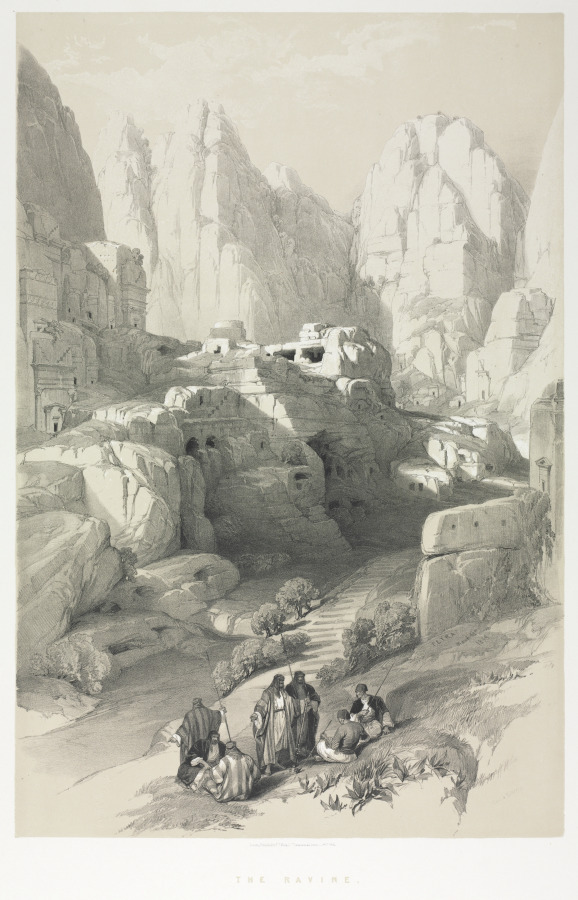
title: The Holy Land, Syria, Idumea, Arabia, Egypt & Nubia: Petra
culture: England, 19th century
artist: Louis Haghe (British, 1806–1885)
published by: F. G. Moon (British, 1797–1871)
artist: after David Roberts (Scottish, 1796–1864)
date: 1842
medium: lithograph with black and beige stone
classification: Print